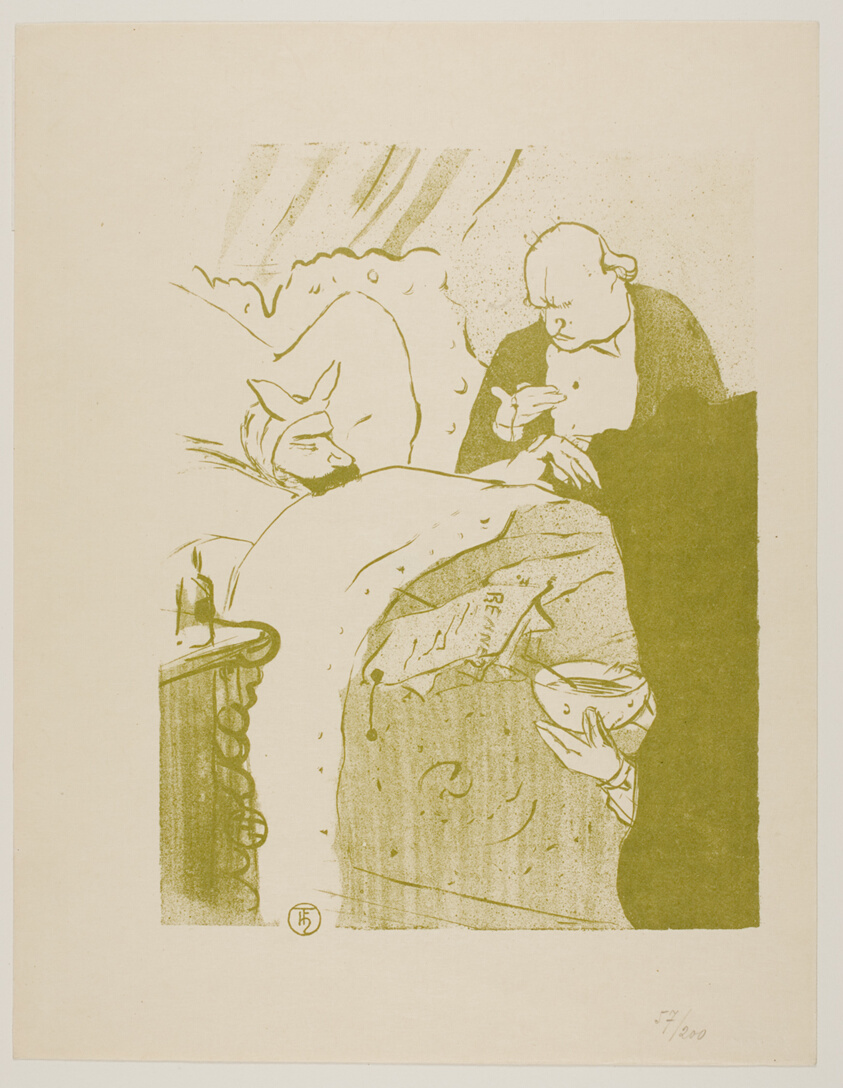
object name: Print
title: Carnot is Sick!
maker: Henri de Toulouse-Lautrec (French, 1864-1901)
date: 1893, printed and published 1927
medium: Color lithograph on cream wove paper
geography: France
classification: lithograph; print; prints and drawing